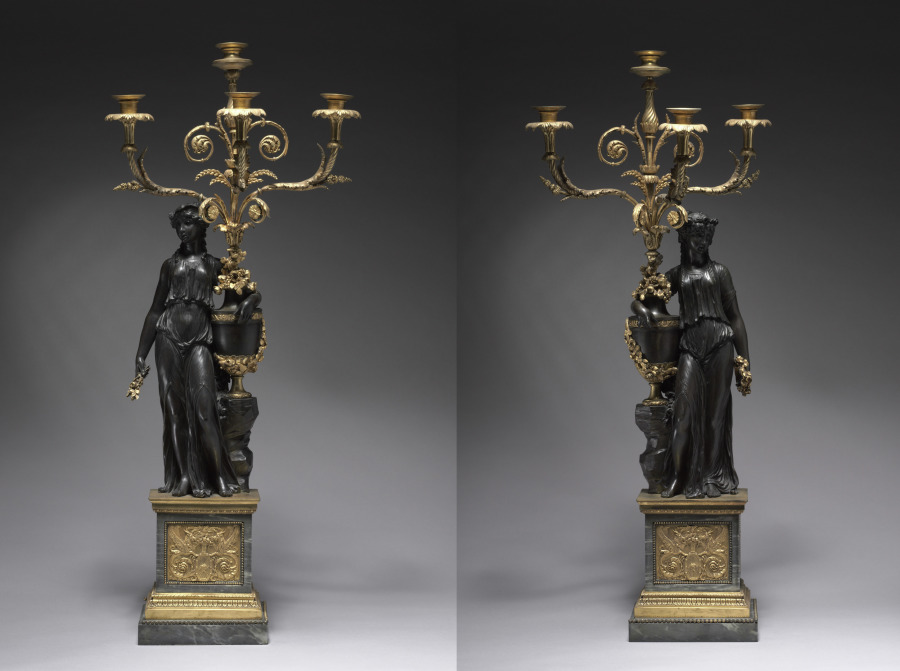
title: Candelabrum Pair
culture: France, 18th century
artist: attributed to Pierre Philippe Thomire (French, 1751–1843)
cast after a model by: Clodion (French, 1738–1814)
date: c. 1780–1785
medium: bronze, gilt bronze, gray marble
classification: Sculpture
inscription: signed behind rock: CLODION.